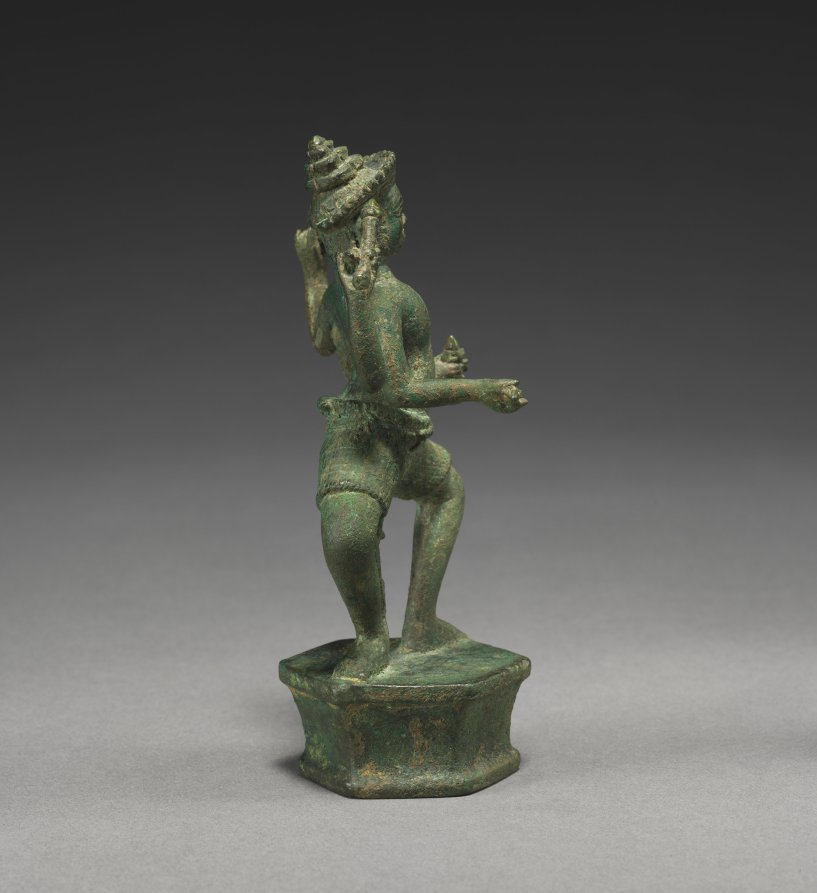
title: Four-Armed Standing Tantric Male Divinity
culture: Cambodia, Koh Ker/Khleang style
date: 925–75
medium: bronze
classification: Sculpture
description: In his four hands, the male tantric deity holds a noose, bell, vajra, and club.